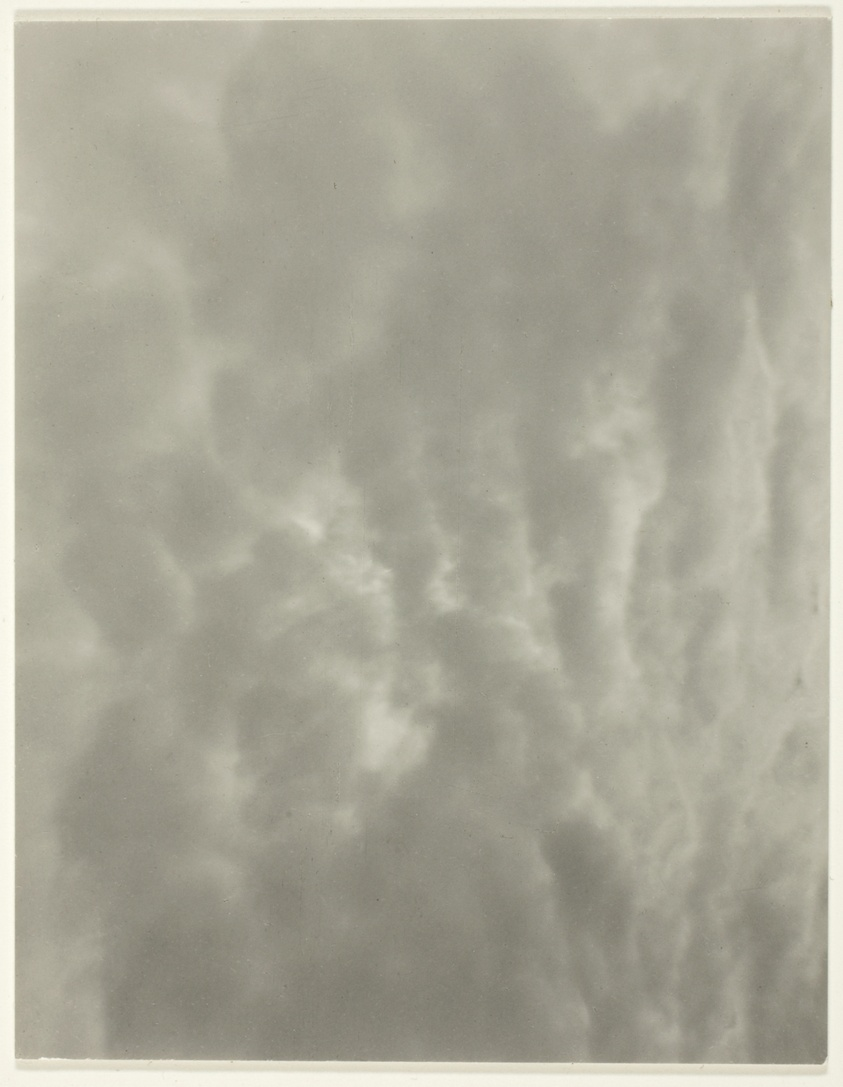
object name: Photograph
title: Equivalent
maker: Alfred Stieglitz (American, 1864–1946)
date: 1923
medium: Gelatin silver print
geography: United States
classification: gelatin silver (developing-out-paper) pr; photographic process; photography; photograph